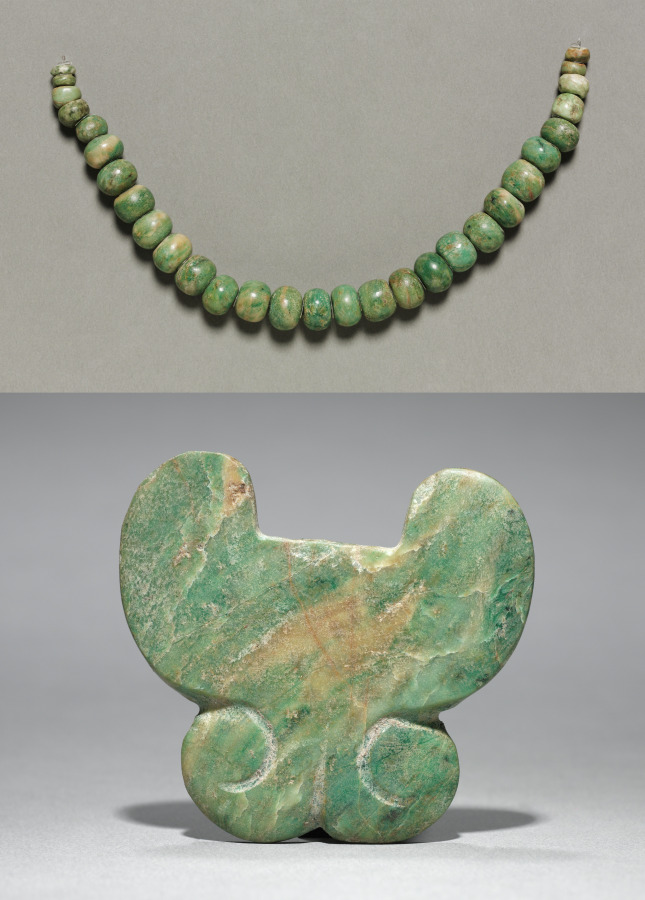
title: Necklace and Nose Ornament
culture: Central Mexico, Teotihuacán, Classic period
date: 150–200 CE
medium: jadeite-albitite?, gold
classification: Jewelry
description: Near Teotihuacán’s largest palace is a temple ornamented with green-feathered serpents, symbols of the earth’s fertility. Beneath the temple were at least 120 human sacrifices, most men, many warriors, and some wearing greenstone ornaments like these, perhaps a set. The sacrifices may have consecrated the temple or a ruler’s tomb, or both.